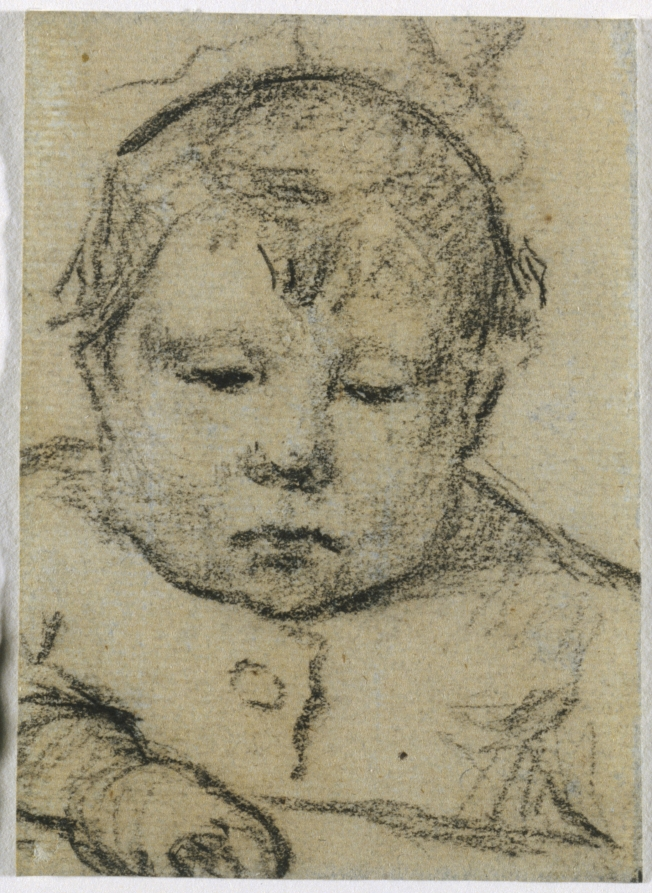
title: Emil Gauguin as a Child, Right Hand Forward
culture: France, 19th century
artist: Paul Gauguin (French, 1848–1903)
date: c. 1875–1876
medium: black crayon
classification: Drawing